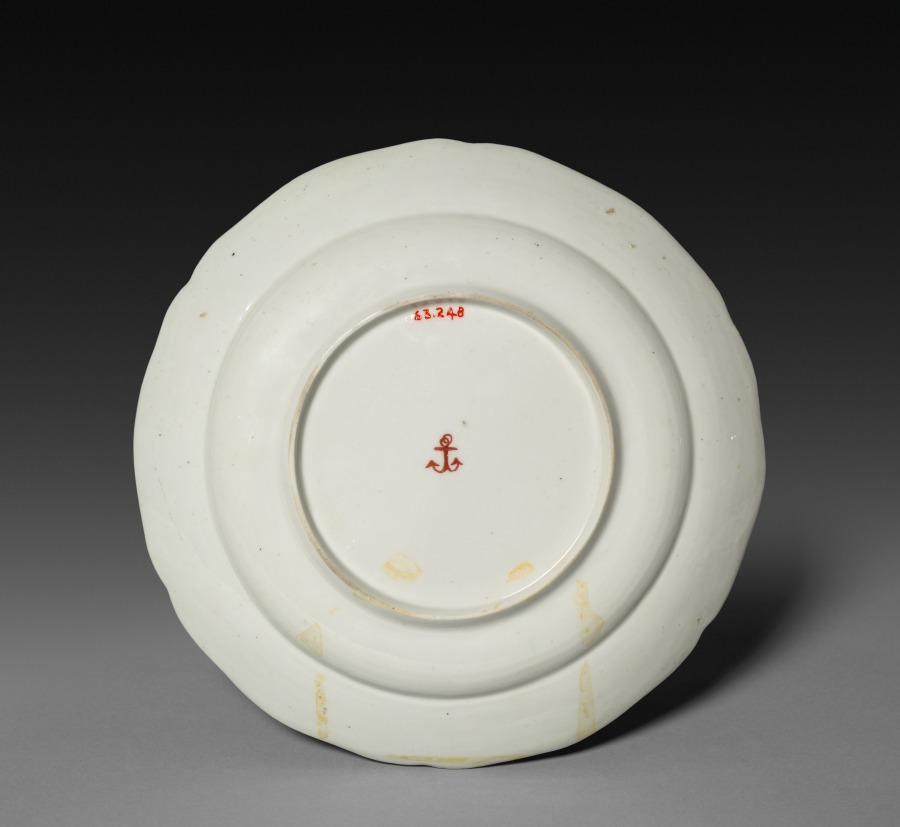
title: Plate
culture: Italy, Venice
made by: Cozzi Porcelain Factory (Italian)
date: 1770–90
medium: soft-paste porcelain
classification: Ceramic